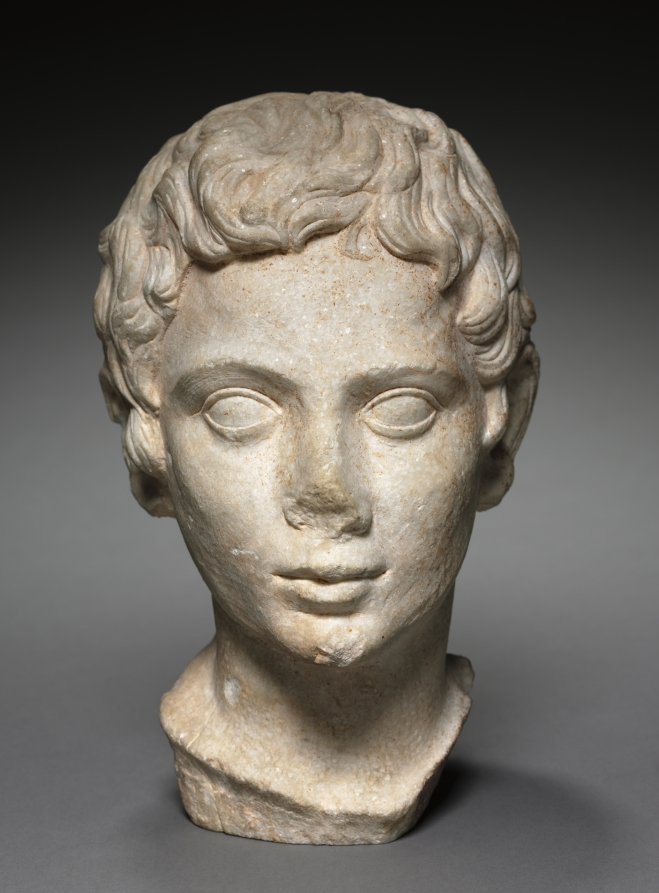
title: Portrait Head of a Youth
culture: Egypt, Alexandria, Roman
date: 1–100 CE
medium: marble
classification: Sculpture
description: Several unusual features of this head suggest that its carving was never finished in antiquity. These include unfinished hair around the ears, small bumps remaining in the hair near the front and top of the head, and the lack of a finely polished surface. Although said to have been found in Egypt, the head is carved of dolomitic marble thought to come from the Saliari region of the northern Greek island of Thasos.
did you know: The carving of this head was never finished.